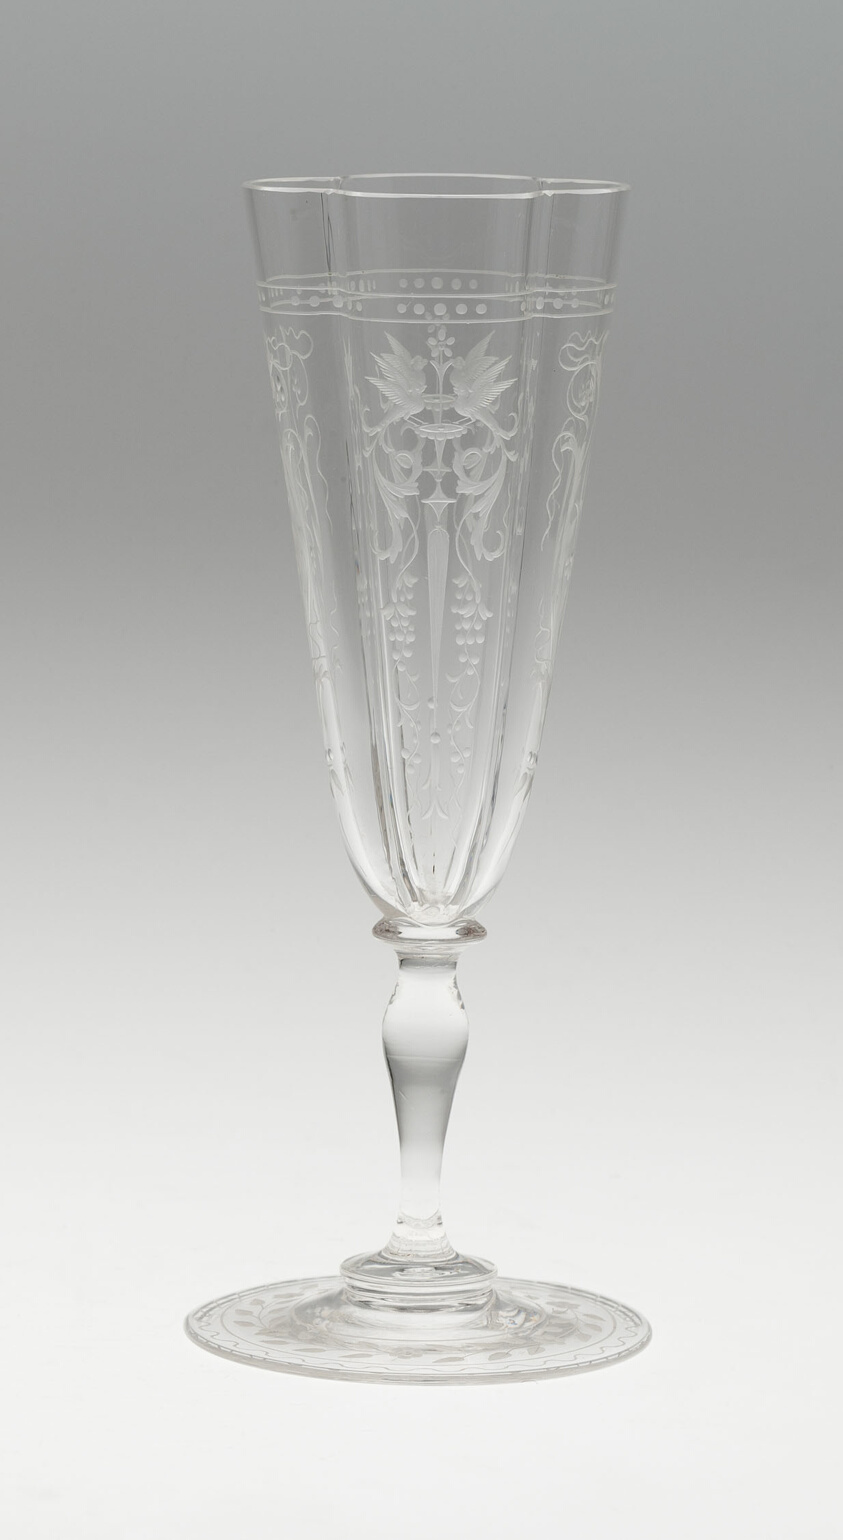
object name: Glass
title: Champagne Flute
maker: J. & L. Lobmeyr (Austrian, founded 1822)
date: 19th century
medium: Glass; clear and blown with quadri-lobed bowl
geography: Austria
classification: drinking vessel; glass; european decorative arts